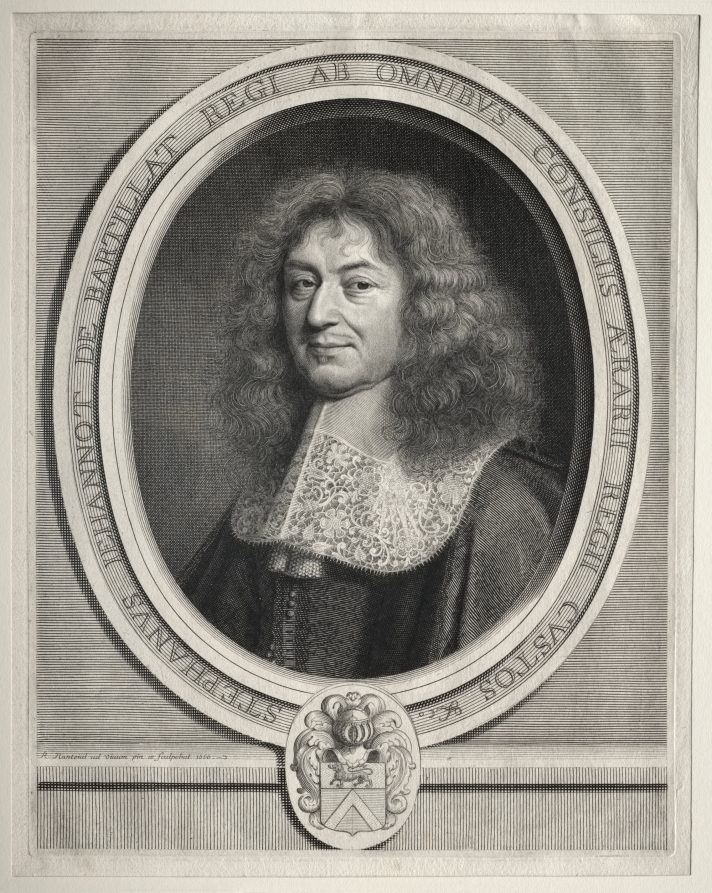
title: Etienne Jehannot de Bartillat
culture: France, 17th century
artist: Robert Nanteuil (French, 1623–1678)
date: 1666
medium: engraving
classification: Print